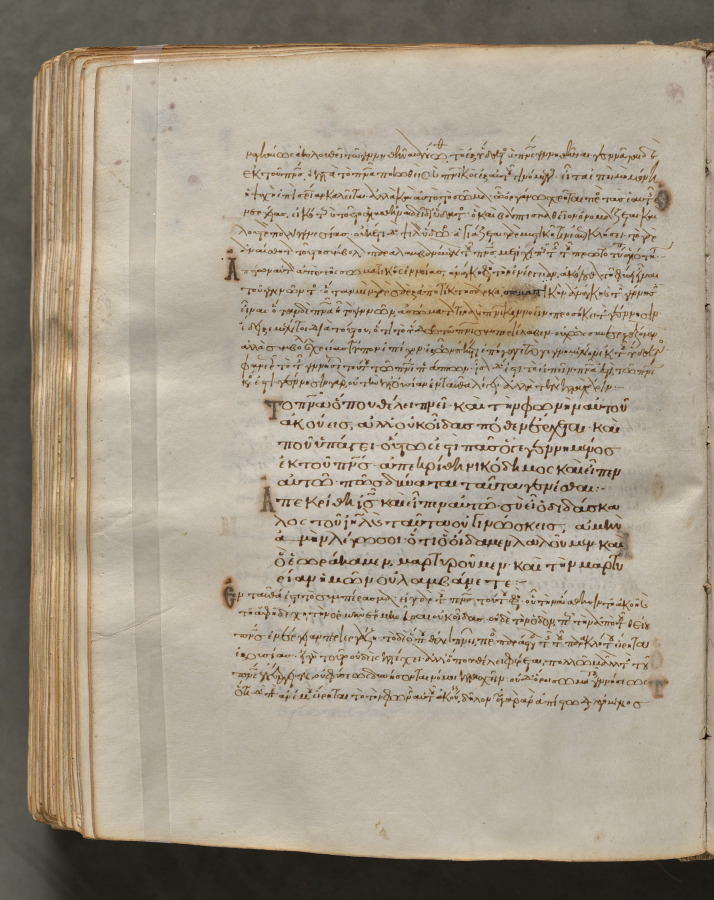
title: Text, folio 333 (verso), from a Gospel Book with Commentaries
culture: Byzantium, Constantinople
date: c. 1000–1100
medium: ink, tempera, and gold on vellum; leather binding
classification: Bound Volume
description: Each of the four gospels in this book opens on a page with brilliantly illuminated borders depicting the author of the text as well as birds—principally peacocks, symbols of the immortality of the soul—and fountains, representing the fountain of life and the salvation of the soul. This volume consists of 428 leaves with texts in Greek. Its level of sophistication suggests that it was probably written and decorated in a monastery in Constantinople.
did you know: Gospel books were carried in procession through Byzantine churches.